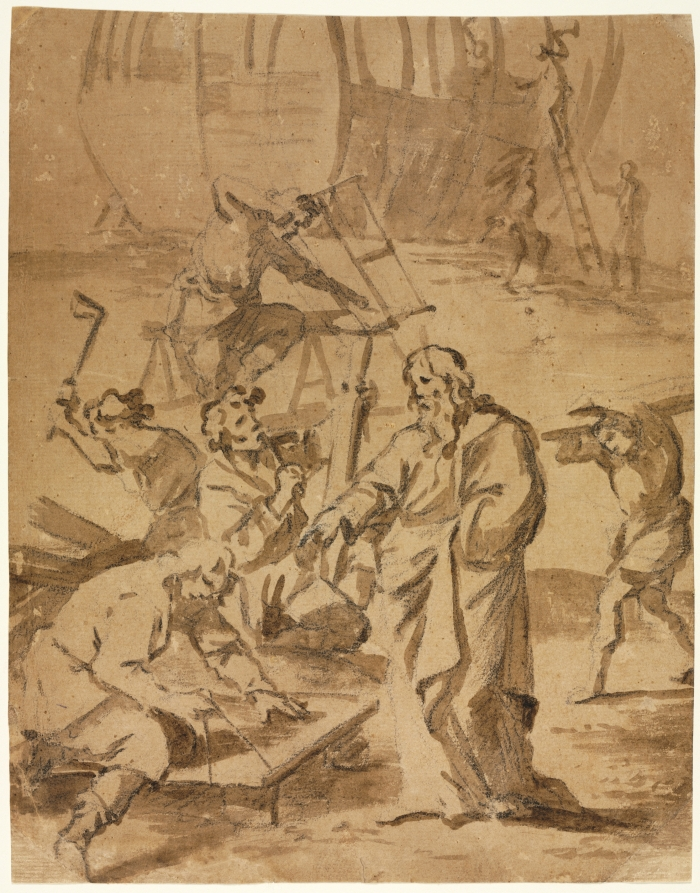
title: Building of the Ark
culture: Italy, 18th century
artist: Alessandro Magnasco (Italian, 1667–1749)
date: first half 1700s(?)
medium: black chalk and brush and brown wash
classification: Drawing